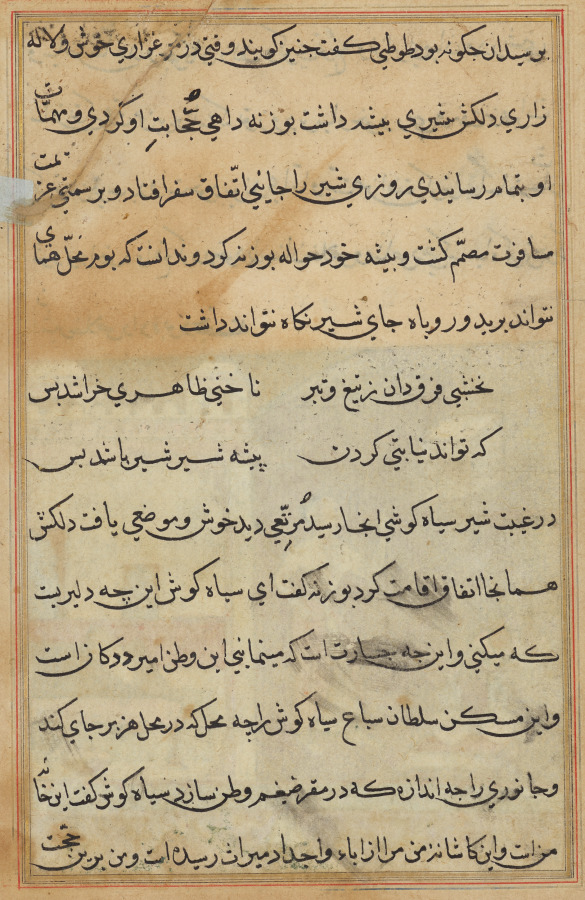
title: Tuti-Nama (Tales of a Parrot)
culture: Mughal India, court of Akbar (reigned 1556–1605)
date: c. 1560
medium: gum tempera, ink, and gold on paper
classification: Painting